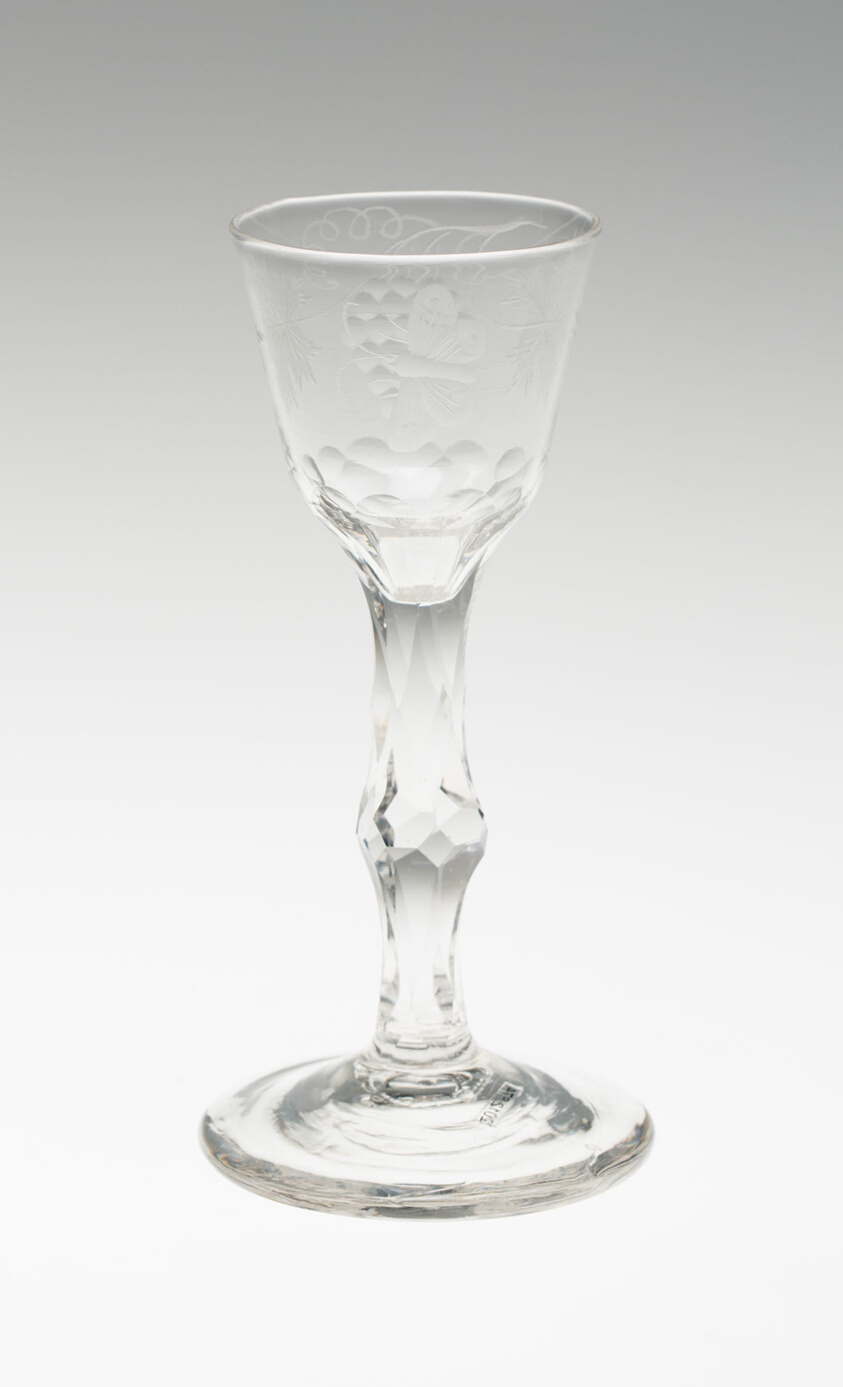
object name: Glass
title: Wine Glass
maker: England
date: c. 1790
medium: Glass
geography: England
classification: drinking vessel; glass